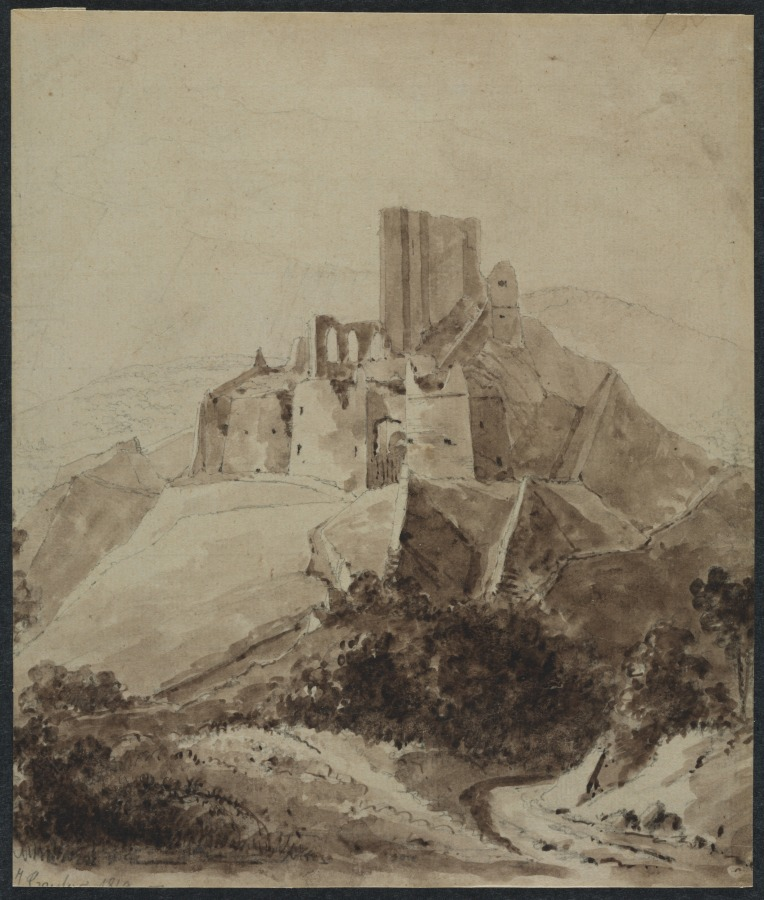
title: Ruins of Chateau d'Arque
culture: France, 19th century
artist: Isidore Justin Taylor (French, 1789–1879)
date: 1819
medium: pen and brown ink, brush and brown wash over black chalk on laid paper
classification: Drawing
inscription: inscribed, lower left, in graphite: illegible upper line of text; lower line of text, probably artist's signature and date, has been cropped. inscribed, verso, center, in graphite: Vue du chateau d'arque / Vue en dieppe / SS on mat, two small pieces of attached paper: one below drawing, in brown ink: le Baron Taylor. 1819; the other, below first, in graphite: Chateau d'arques. These pieces of paper do not match that of the drawing support, and were probably salvaged from an earlier mount.